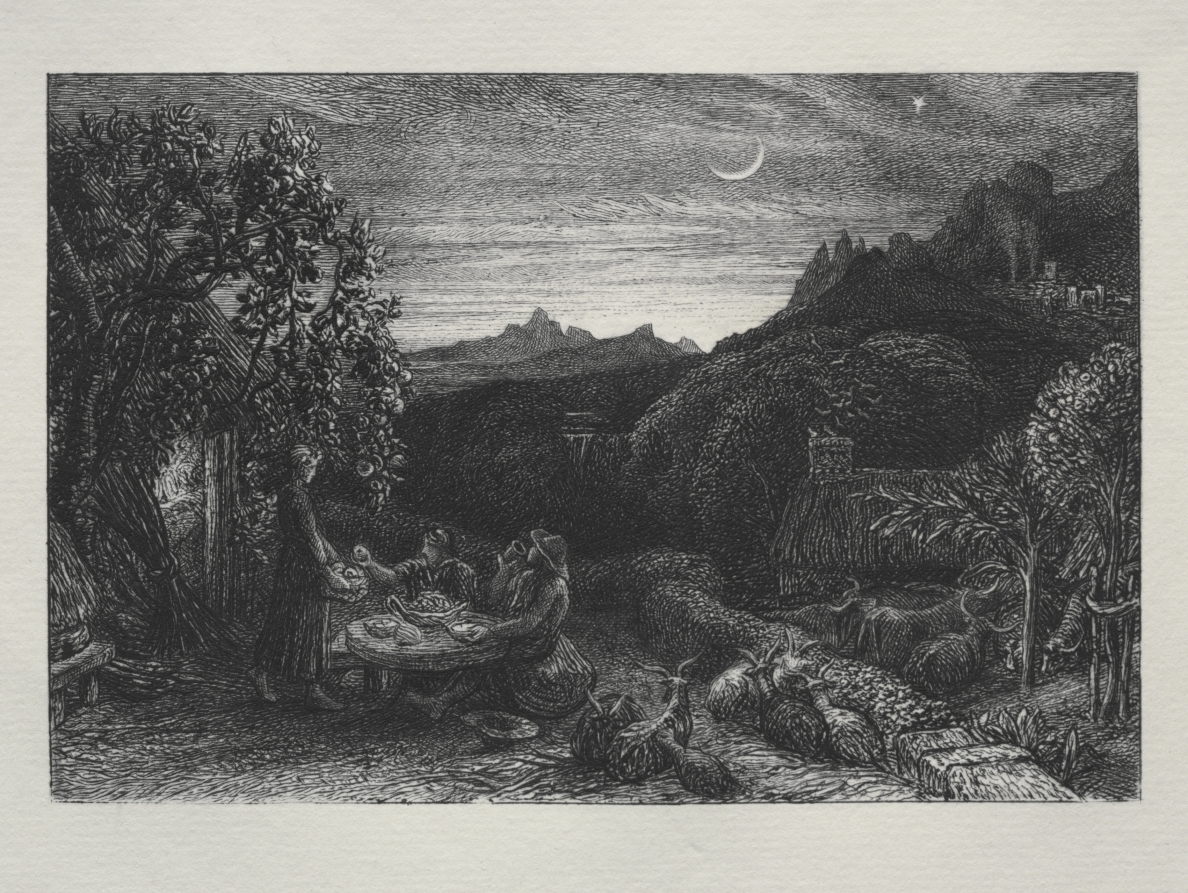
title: The Homeward Star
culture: England, 19th century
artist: Samuel Palmer (British, 1805–1881)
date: 1883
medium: etching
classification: Print